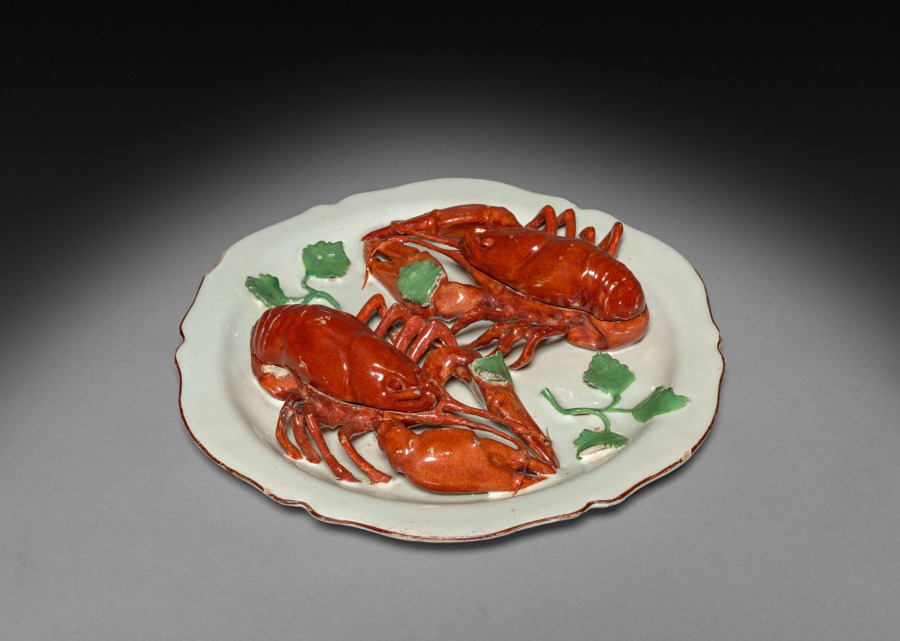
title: Plate with Crayfish and lid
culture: France, Strasbourg, 18th century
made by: possibly by Strasbourg Factory (France)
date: 1750–1775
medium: faience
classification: Ceramic